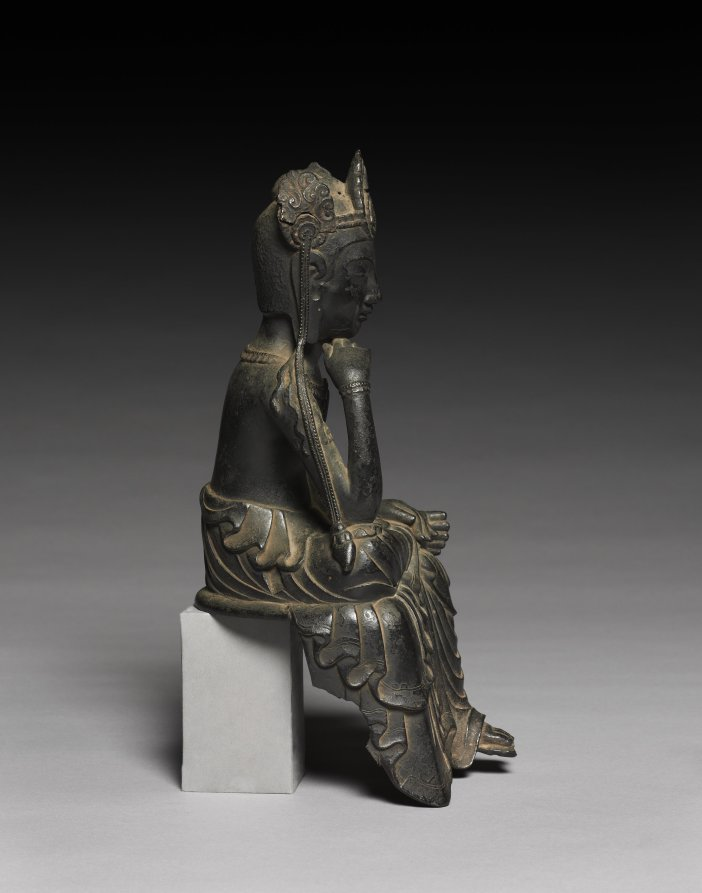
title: Buddha of the Future (Miroku Bosatsu)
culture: Japan, Asuka period (538–710)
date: late 600s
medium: cast bronze, incised, with traces of gilding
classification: Sculpture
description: Buddhism was introduced to Japan in the sixth century. For early Japanese devotees, Buddhism offered the promise of salvation through faith in the Buddha of the Future, who would appear at the end of the world. The concept of eternal salvation held particular resonance with the Japanese aristocracy, who became the staunchest supporters of this new faith. Small sculptures like this one, with its gentle grace and powerful presence, were popular devotional objects.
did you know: The Sanskrit name of this being, Maitreya, derives from the Sanskrit word for friend, mita.